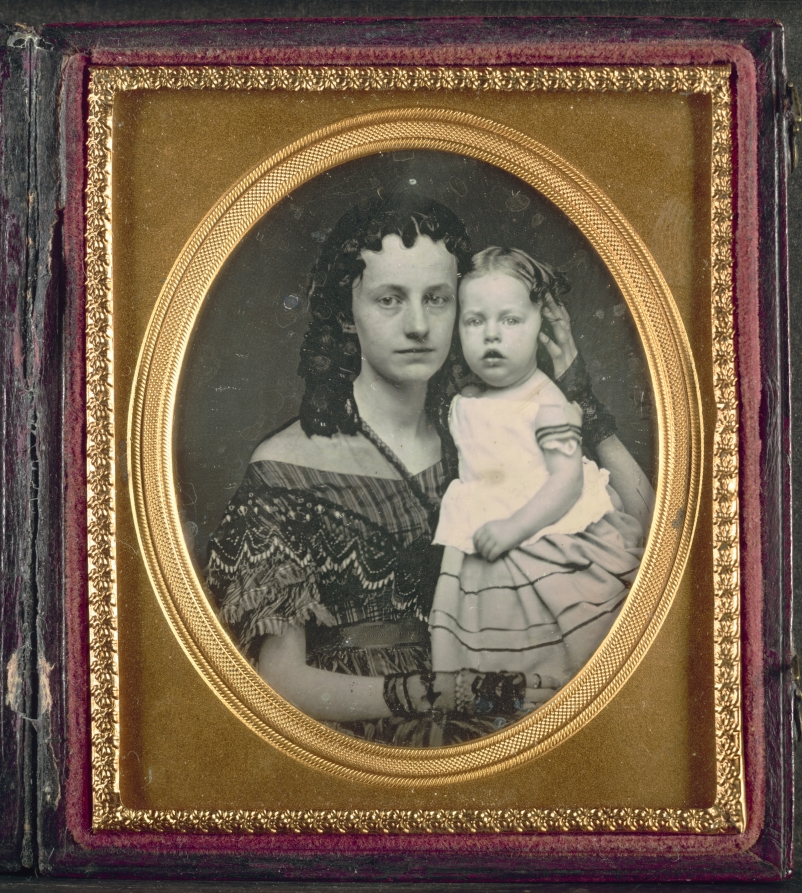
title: Mother and Child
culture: America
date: c. 1860–65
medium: daguerreotype, applied color, sixth-plate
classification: Photograph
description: Some of the most inventive and technically skilled practitioners in the early history of photography are as yet unidentified. However, with time more of these individuals will probably be recognized by name. Introduced into America soon after its invention in 1839 by the Frenchman Louis-Jacques-Mandé Daguerre, the daguerreotype flourished from 1840 to the mid-1860s. This beautiful daguerreotype in its original case is an outstanding example of a very popular subject: mother and child. The polished silver plate precisely renders in warm tones the likeness of the elaborately dressed sitters. The mother gently steadied the child's head so that it would not move during the long exposure required by the daguerreotype process. Clearly, the maker's knowledge of chemistry and traditional principles of design were necessary for this charming portrait.